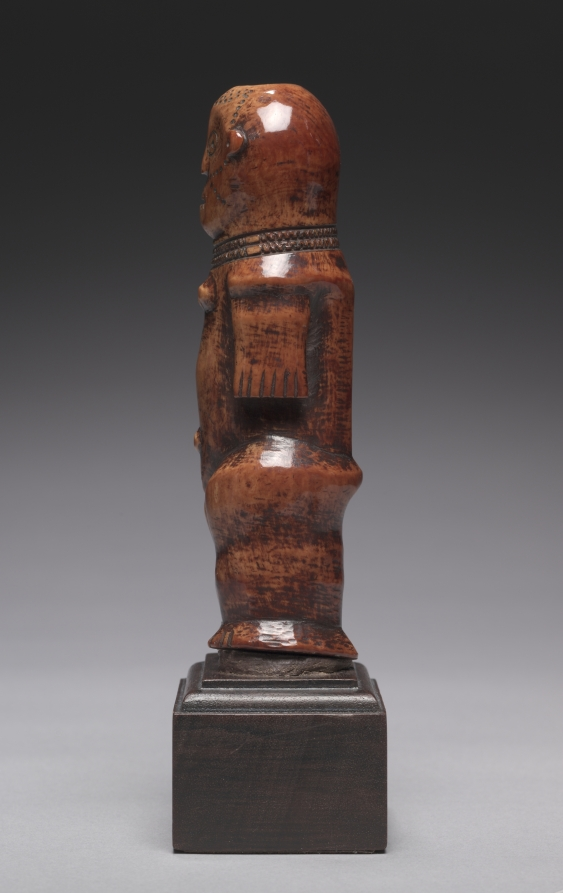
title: Figure (iginga)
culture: Africa, Central Africa, Democratic Republic of Congo, Lega-style maker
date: probably 1800s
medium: Elephant ivory, tukula, and oil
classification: Sculpture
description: The life of Lega men and women is structured around their advancement through the different grades of the Bwami association. Fulfilling political, social, religious, and other roles, the members’ ultimate purpose is the pursuit of wisdom and excellence. Ivory figurines were reserved for members of the two highest Bwami grades, in which the core of the Lega’s moral philosophy is revealed.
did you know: The dark surface (patina) of this sculpture comes from years of handling and the application of oil and a red powder called tukula; it was originally cream-colored!